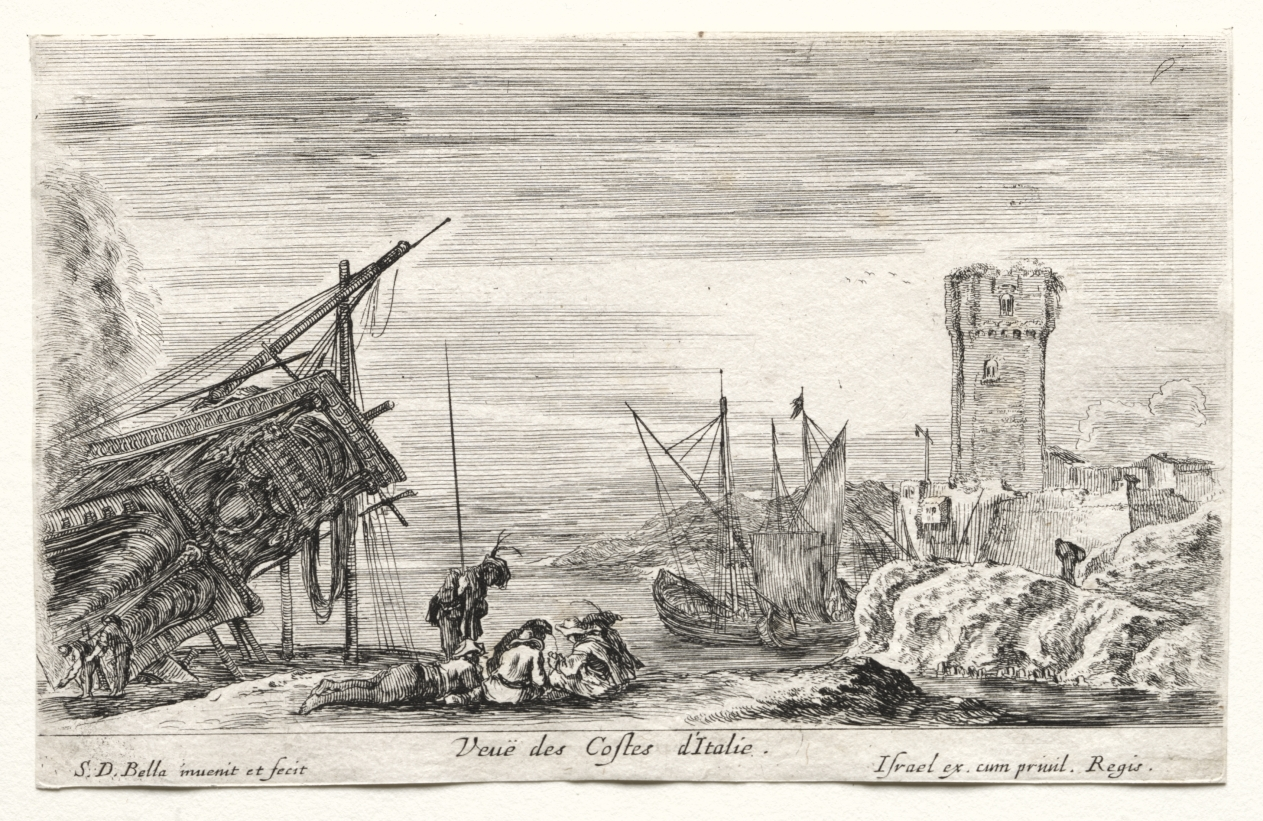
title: Views of Sea Ports: View of the Italian Coast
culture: Italy, 17th century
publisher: Israël Henriet (French, c. 1590–1661)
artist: Stefano Della Bella (Italian, 1610–1664)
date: 1647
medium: etching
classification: Print